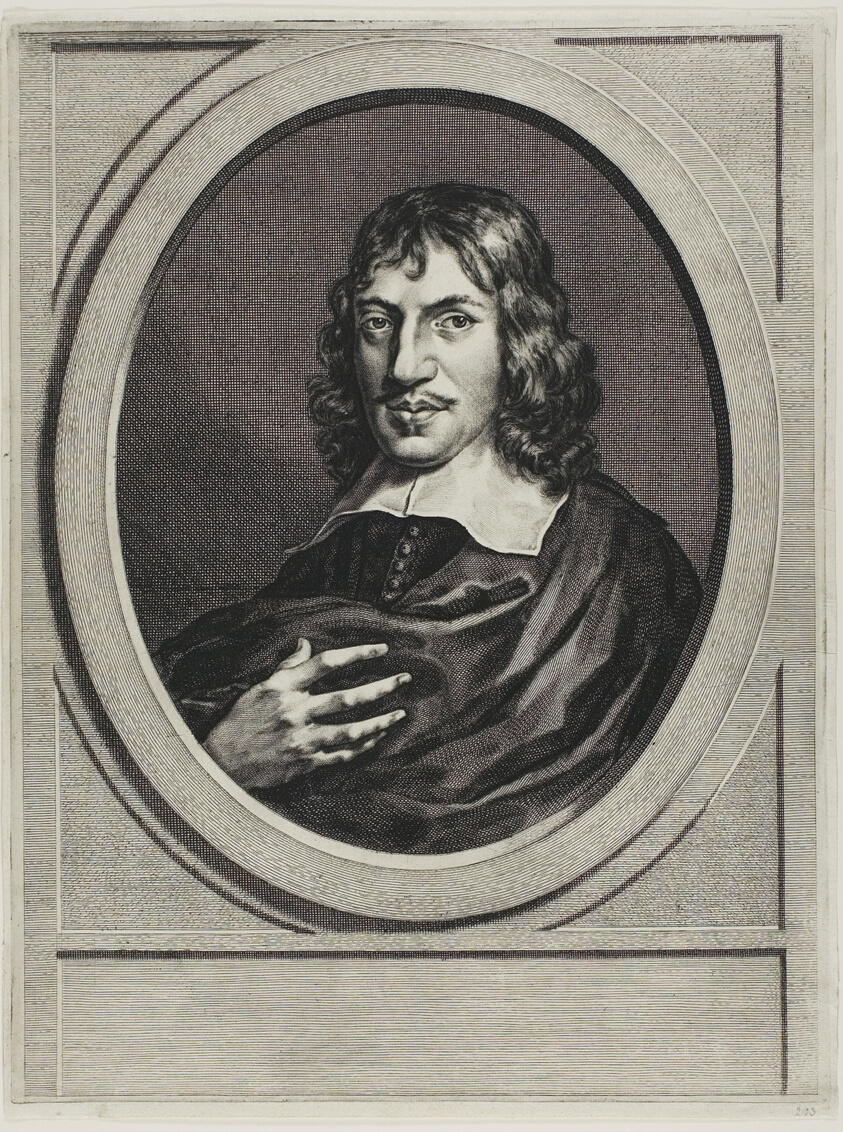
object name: Print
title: Portrait of Taddeus de Lantman, Preacher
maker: Hendrik Bary (Dutch, c. 1640-1707)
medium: Engraving printed in black on paper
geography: Netherlands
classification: engraving; print; prints and drawing